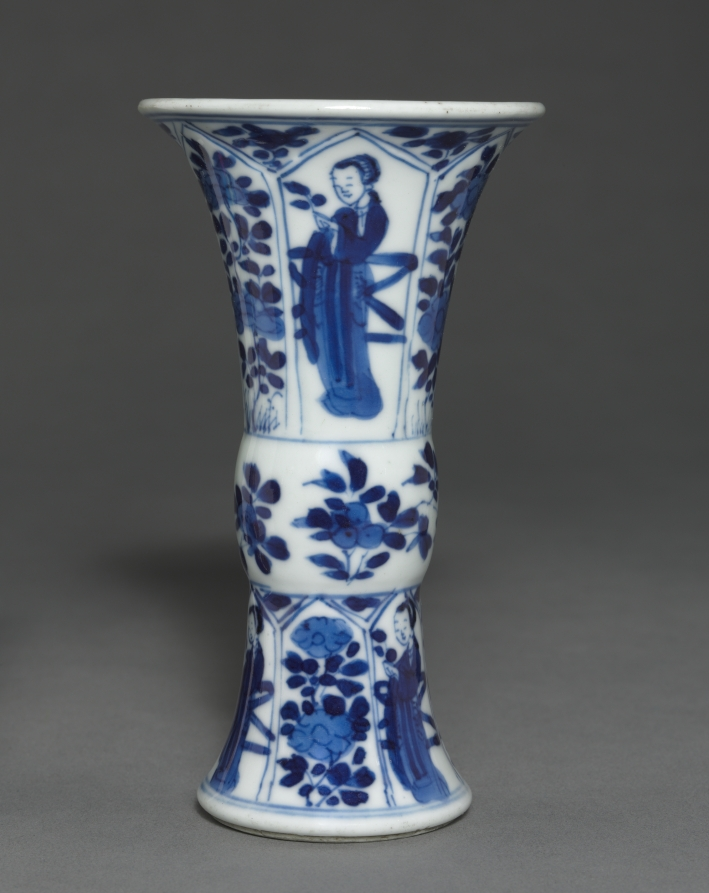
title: Beaker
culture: China, Qing dynasty (1644-1911), Daoguang reign (1821-1850) - Xianfeng reign (1851-1861)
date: 19th Century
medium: porcelain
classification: Ceramic